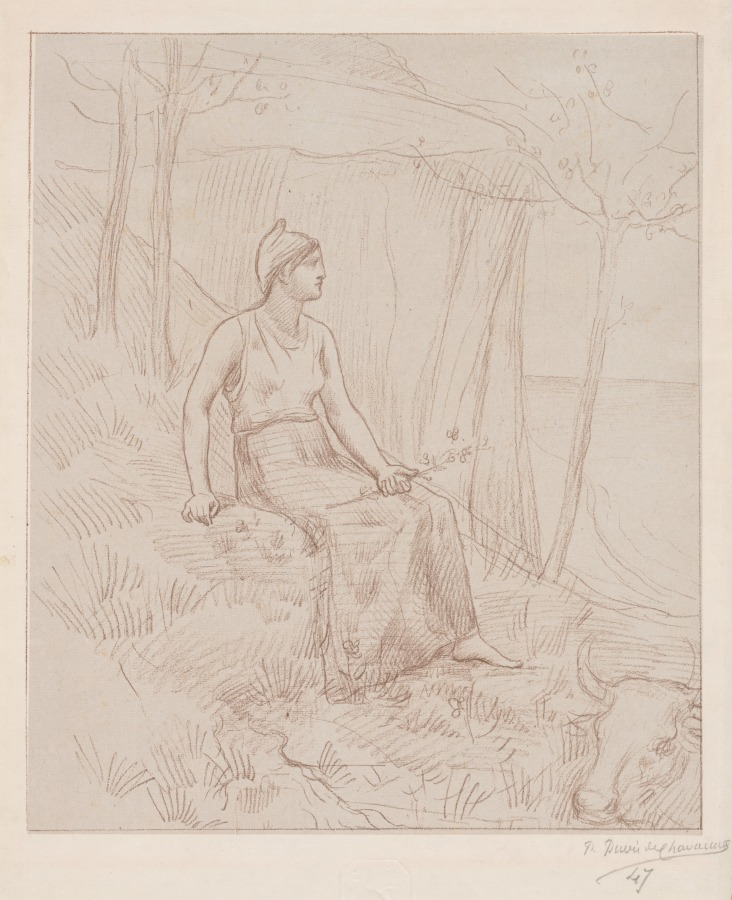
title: Normandy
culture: France, 19th century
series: L'Estampe Originale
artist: Pierre Puvis de Chavannes (French, 1824–1898)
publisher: Andre Marty (French, b. 1857)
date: 1893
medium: color lithograph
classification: Print